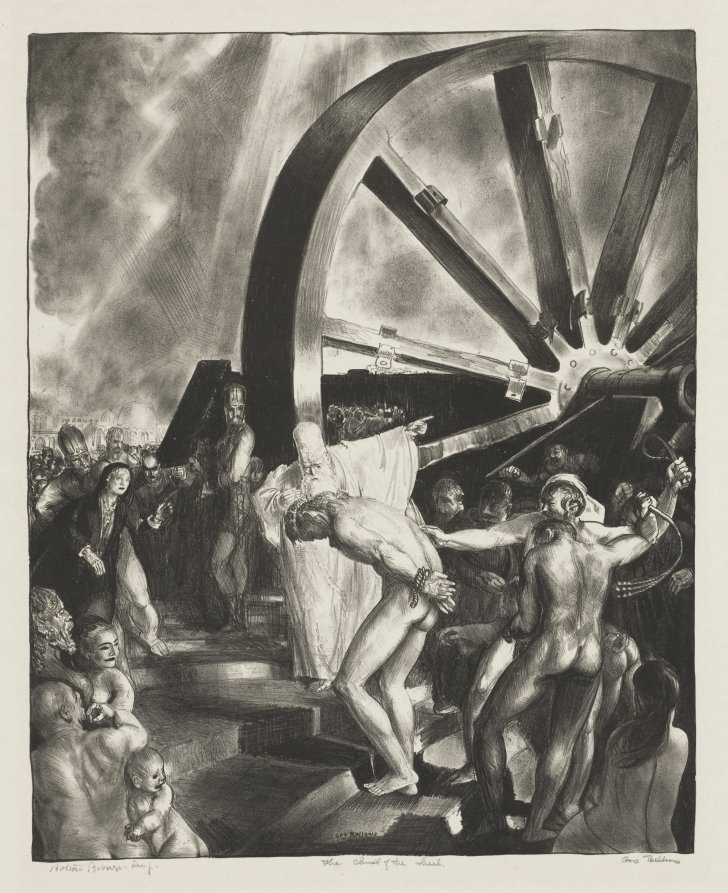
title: The Christ of the Wheel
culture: America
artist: George Bellows (American, 1882–1925)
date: 1923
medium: lithograph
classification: Print